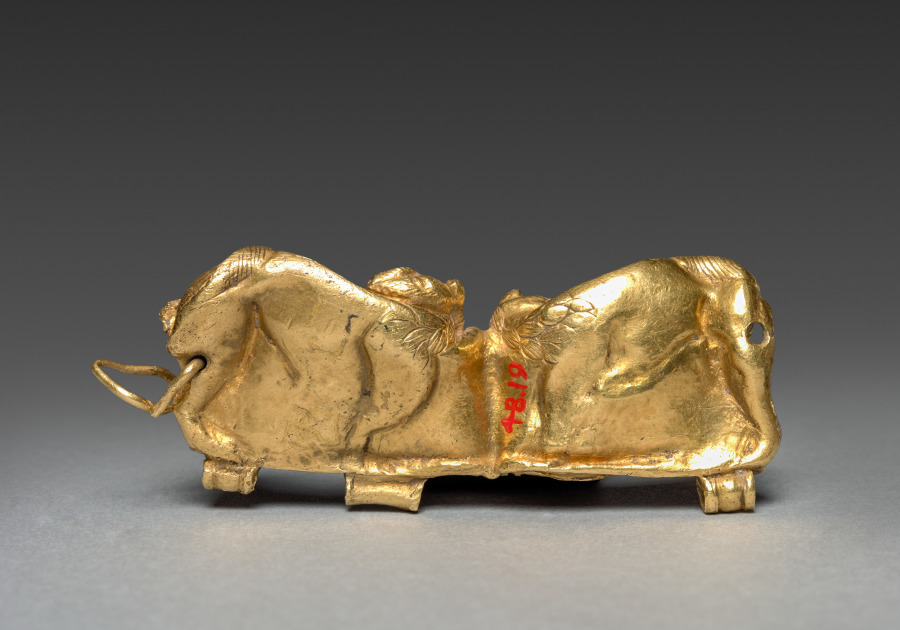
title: Repoussé Gold Clasp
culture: Europe, 13th century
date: 1200s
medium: repousé gold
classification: Jewelry